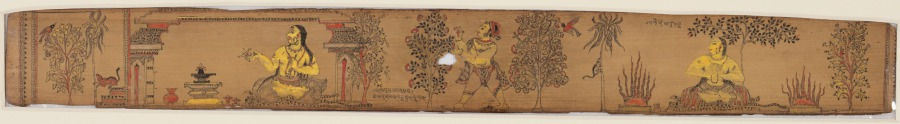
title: A Prince Performs Austerities (recto); Shiva and His Followers Return to Mount Kailash (verso), from a Romance of Chandrabhanu and Lavanyavati of Upendra Bhanja (1670–1740)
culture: Eastern India, Odisha (formerly Orissa)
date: 1700s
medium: gum tempera and lampblack on palm leaf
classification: Painting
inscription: kailasakandara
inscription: 1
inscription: e pancagni gartta acchi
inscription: e rajāpua tapasā kari sivapūjā kari acchi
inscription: agni jalum accchi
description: In this illustration from the beginning of a popular romance, a prince performed intense austerities and devotions to the Shiva linga in order to obtain a divine woman. He practices yoga surrounded by fires during the hot season and wanders unsheltered during monsoon, as seen on the recto. On the verso, Shiva has answered his prayers and returns home to his "cave on Mount Kailash," as stated in the inscription.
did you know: There is a three-legged yogi on the verso.